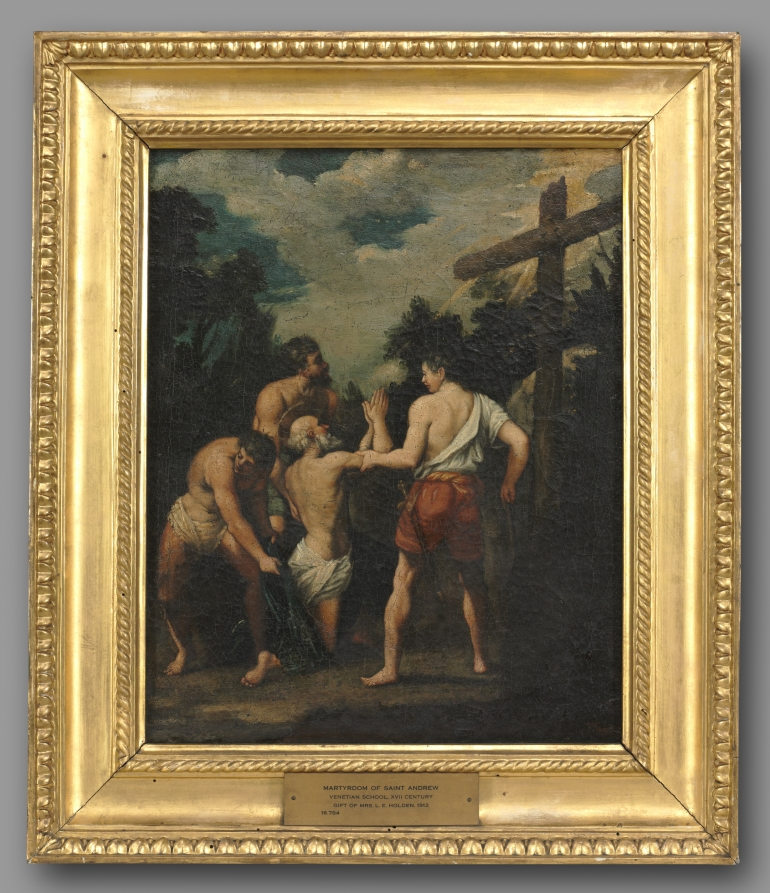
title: Martyrdom of Saint Andrew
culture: Italy, 17th century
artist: copy after Guido Reni (Italian, 1575–1642)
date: 1600s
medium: oil on canvas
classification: Painting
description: This small devotional picture by an anonymous 17th-century Venetian artist drew his composition from Guido Reni's large St. Andrew Led to Martyrdom fresco in Rome's Church of San Gregorio al Celio. The CMA painting portrays the central image of Reni's 1608 fresco by Reni. St. Andrew and his brother Peter were apostles of Christ and left all of their possessions to follow him. Andrew was martyred in Achaea. He requested to be crucified on the X-shaped cross because Andrew considered himself unworthy of dying on the same cross as Christ. Reni depicted an X-shaped cross in the fresco, while in this painting, the Latin cross is used. The Latin cross was common to Northern art, suggesting that the artist of this painting may have been Venetian. This representation of St. Andrew's martyrdom focuses on St. Andrew's adoration of the cross. The CMA version does not possess the chaos of Reni's larger scene, focusing instead on the central four figures, whereas in the original, a crowd of people surrounds the central group. The figure on the left bends in an unnatural pose and lacks the precision of Reni's original forms, suggesting that this piece is by another artist. The cross, originally seen in the distance, appears in the foreground of the smaller work, brought closer to St. Andrew to emphasize his relationship with God and his acceptance of his coming death.